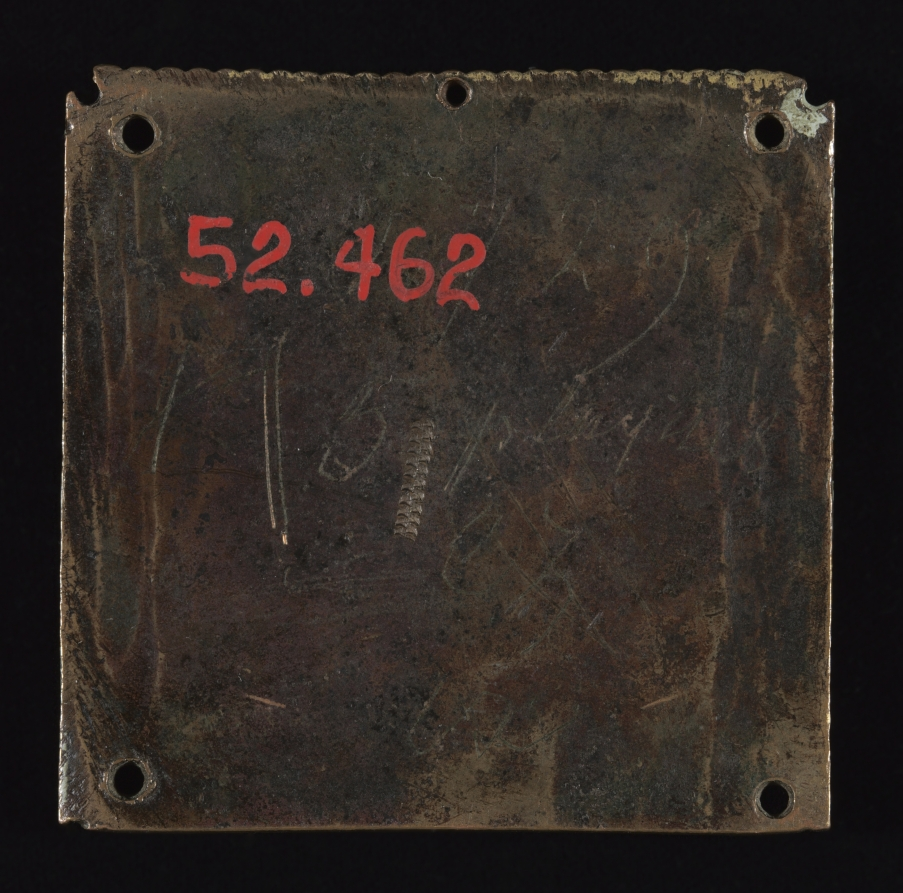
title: Plaque: Simon and Thaddaeus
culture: Mosan, Valley of the Meuse, Romanesque period, 12th century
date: c. 1160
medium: gilded copper, champlevé enamel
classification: Enamel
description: It is likely this pair of enamel plaques depicting the apostles Simon with Thaddeus and Thomas with Matthew once formed part of the decoration of a portable altar, a reliquary triptych, or some other kind of liturgical object.